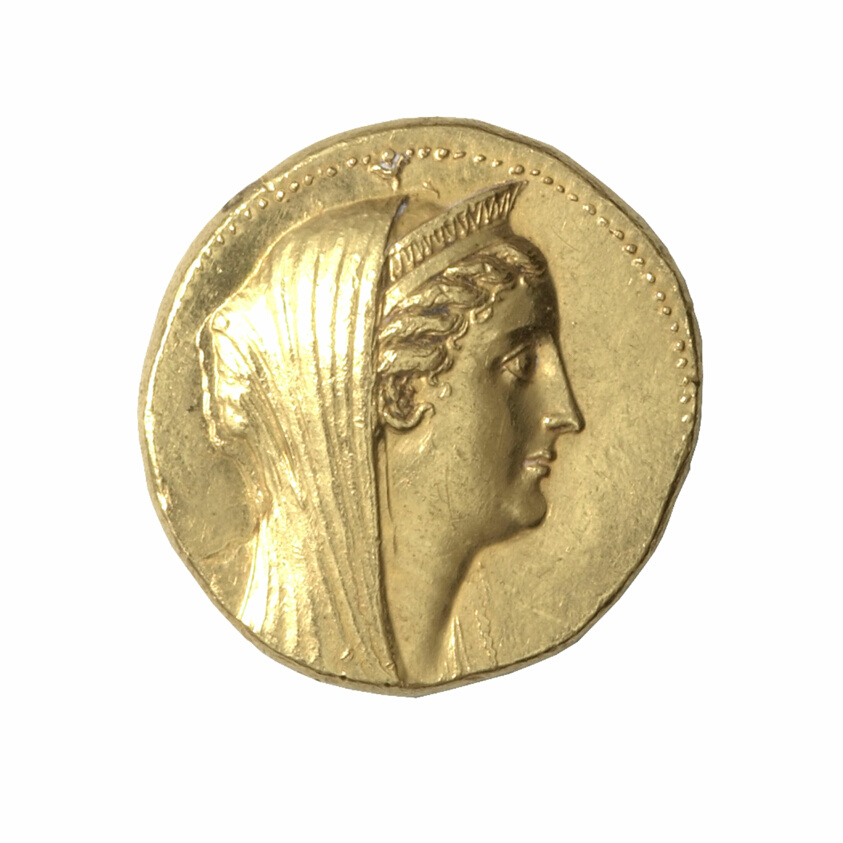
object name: Coin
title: Octadrachm (Coin) Portraying Queen Arsinoe II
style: ptolemaic, greco-roman (egyptian), ancient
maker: Greek, Ptolemaic; probably minted in Alexandria, Egypt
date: After 270 BCE, issued by King Ptolemy II or III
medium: Gold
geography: Alexandria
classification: coin; ancient art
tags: portraits